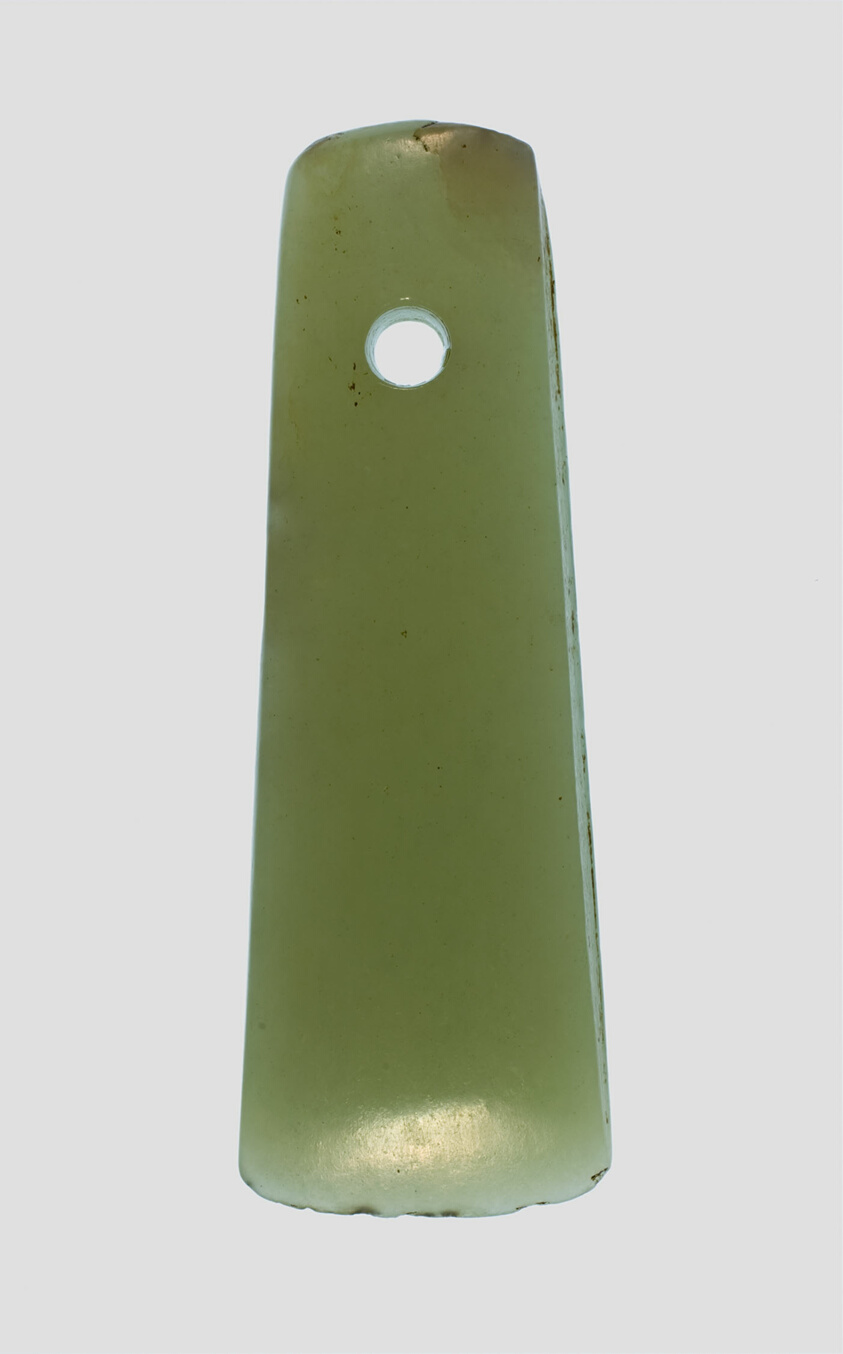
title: Axe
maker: China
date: Shang dynasty (c.1600–1050 BC)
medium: Jade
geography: China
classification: jade; asian art